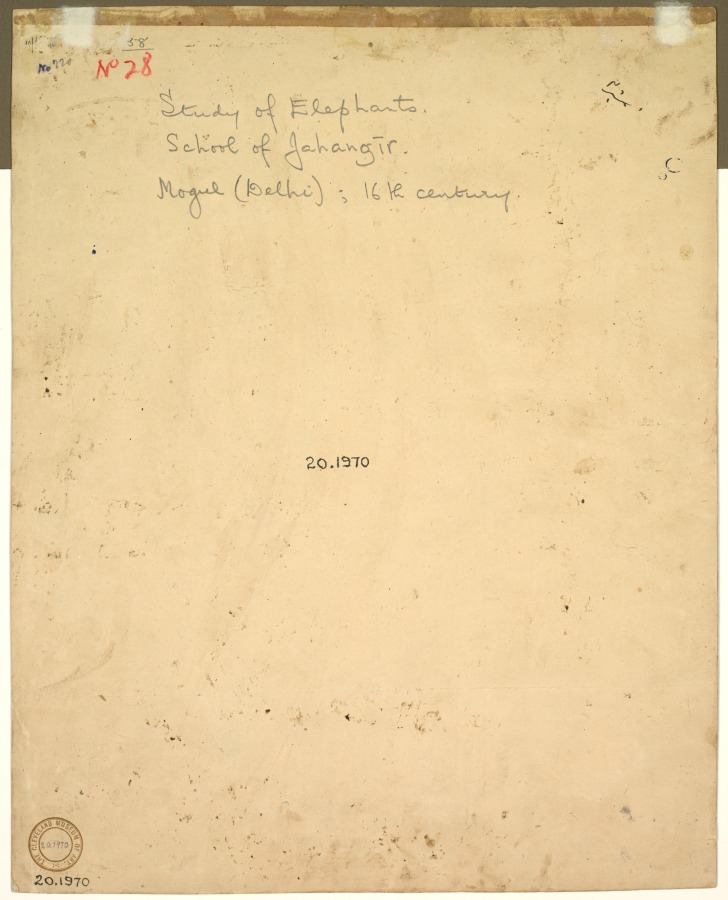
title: Portrait of Emperor Jahangir Riding an Elephant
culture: India, Mughal Dynasty (1526-1756)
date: 1700–1750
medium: drawing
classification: Painting